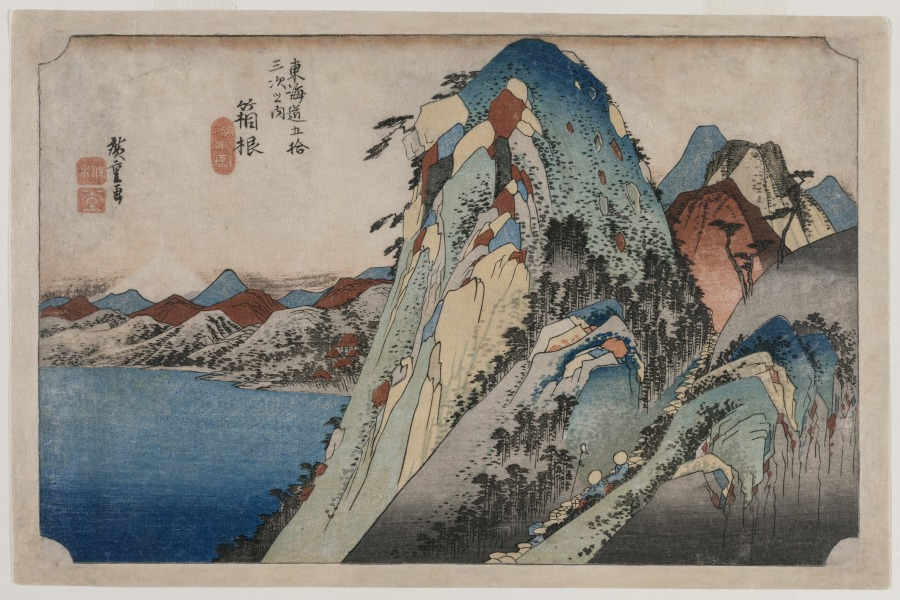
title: Picture of the Lake at Hakone, from the series 53 Stations of the Tokaido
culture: Japan, Edo period (1615–1868)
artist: Utagawa Hiroshige (Japanese, 1797–1858)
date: 1833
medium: color woodblock print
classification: Print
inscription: Signature: Hiroshige ga. Publisher: Takenouchi Magohachi (Hoeido).